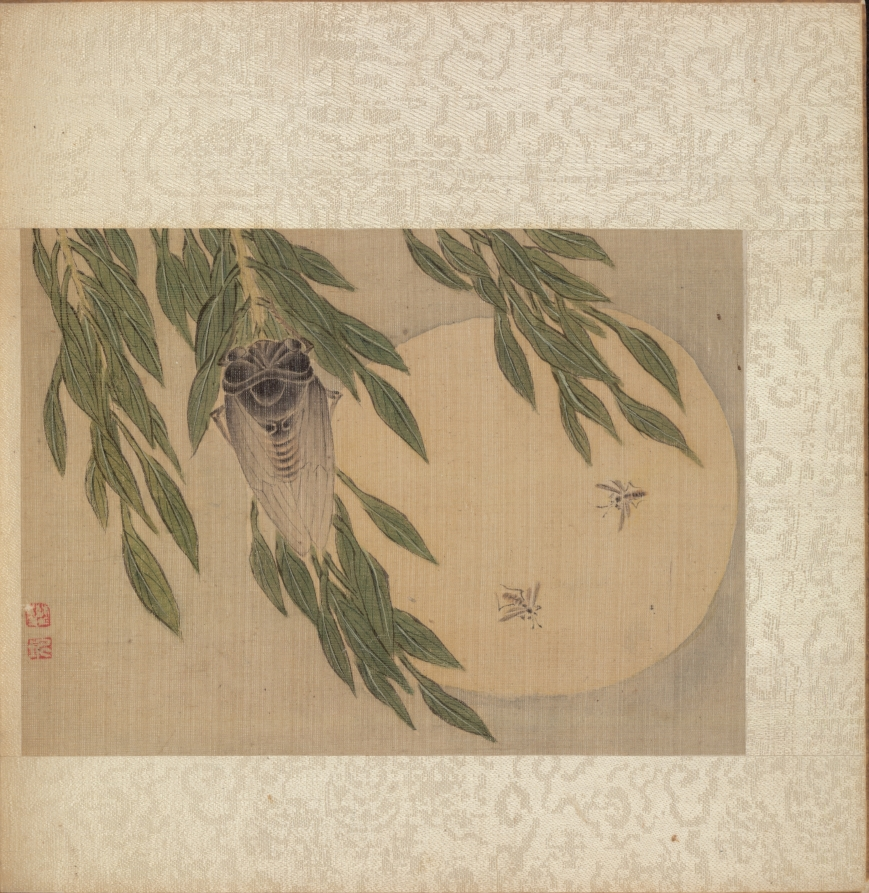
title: Album of Miscellaneous Subjects, Leaf 6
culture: China, Qing dynasty (1644-1911)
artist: Fan Qi (Chinese, 1616–after 1694)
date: early 1650s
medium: album leaf, ink and color on silk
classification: Painting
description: Zhou Yi's calligraphy is across from the painting on leaf six. His colophon reads: The bright moon emerges through the willow, The fragrance of flowers is already difficult to retain. Listening above these tall branches, I sense that faraway in my native place autumn has arrived. Obstructed, all the diminished waters flow, Abruptly the sound of a lute wafts to and fro. A strong wind, unabated, blows among the willow branches.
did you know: A cicada clings to a willow branch while two bees fly in the moonlight .